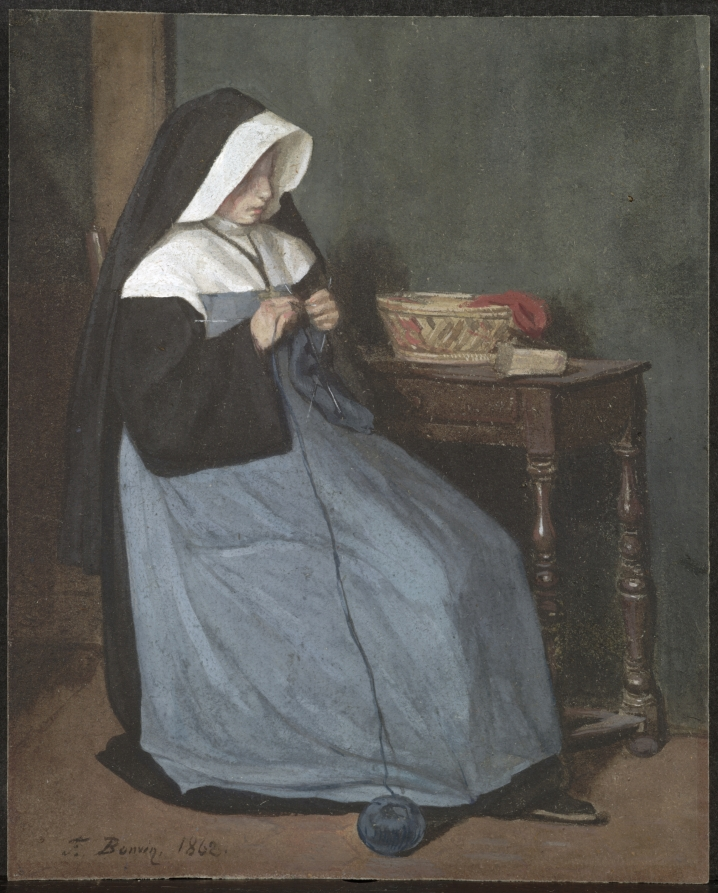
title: A Nun Seated at a Table Knitting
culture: France, 19th century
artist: François Bonvin (French, 1817–1887)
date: 1862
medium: gouache and watercolor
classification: Drawing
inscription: lower left, in black gouache: F. Bonvin. 1862.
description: François Bonvin was a prolific watercolorist, and he developed a lifelong interest in modest religious subjects showing scenes of everyday life. This delightfully simple image of a nun knitting reveals the artist's appreciation for 17th-century Dutch artists such as Johannes Vermeer (1632-1675), whose work he copied.